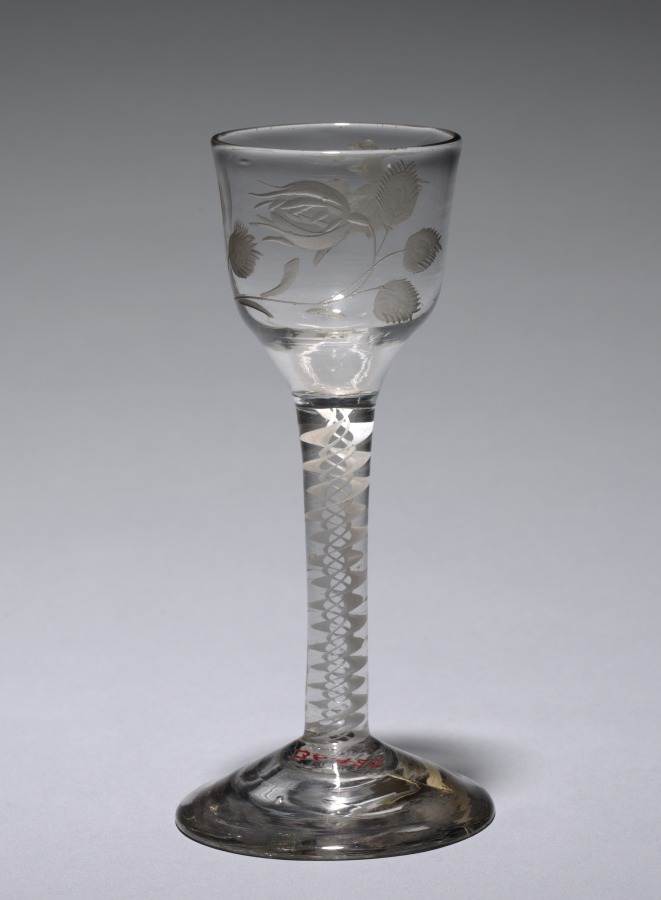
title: Wine Glass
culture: England, 18th century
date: 1750–1799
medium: glass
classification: Glass